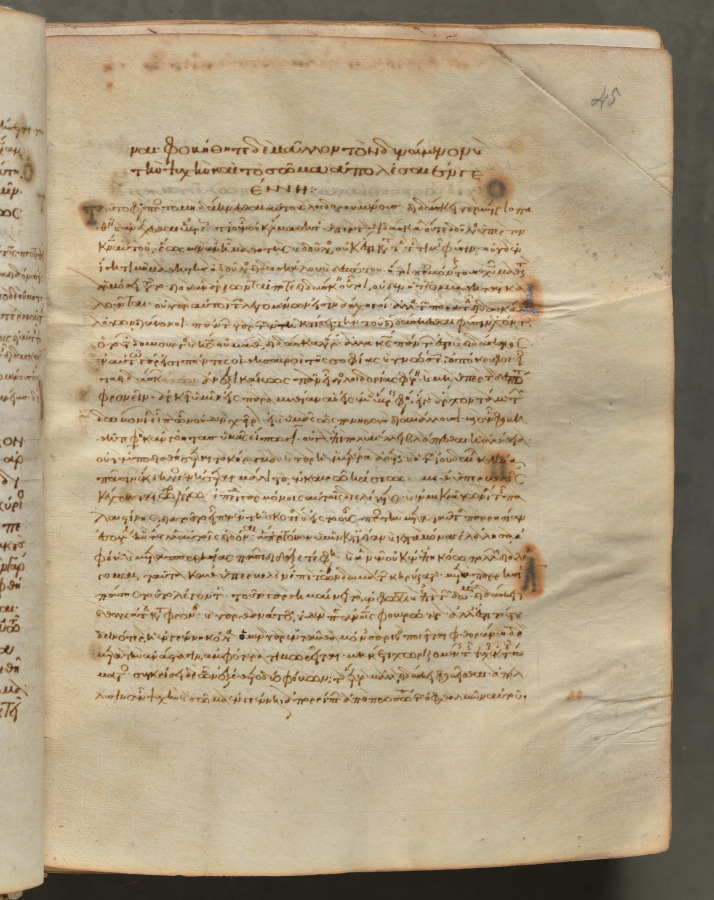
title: Text, folio 45 (recto), from a Gospel Book with Commentaries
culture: Byzantium, Constantinople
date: c. 1000–1100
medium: ink, tempera, and gold on vellum; leather binding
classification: Bound Volume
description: Each of the four gospels in this book opens on a page with brilliantly illuminated borders depicting the author of the text as well as birds-principally peacocks, symbols of the immortality of the soul-and fountains, representing the fountain of life and the salvation of the soul. This volume consists of 428 leaves with texts in Greek. Its level of sophistication suggests that it was probably written and decorated in a monastery in Constantinople.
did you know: Gospel Books were carried in procession through Byzantine churches.